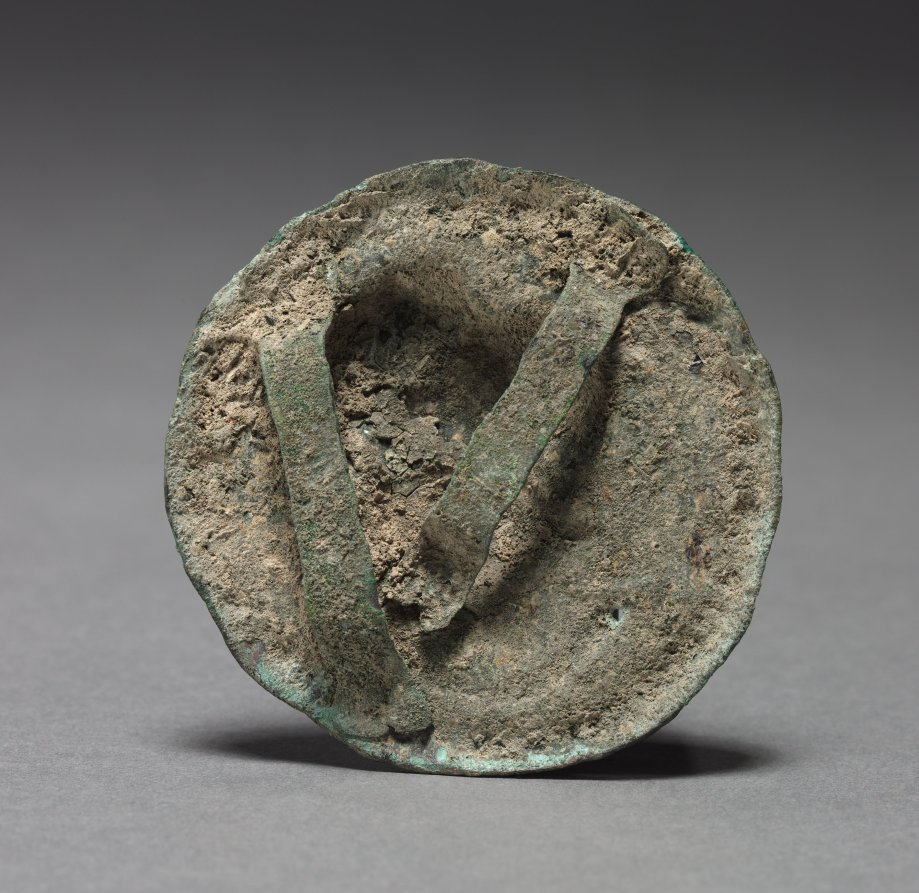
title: Roundel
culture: India, Satavahana period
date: c. 100–1 BCE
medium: bronze with repoussé and chased designs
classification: Sculpture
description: The form of a medallion with a figural bust and bead-and-reel border indicates the artist’s familiarity with Greco-Roman objects. The figure itself, however, is Indian, with voluminous, coiled coiffures and prominent jewelry. This object was probably worn as an ornament on a belt or girdle.